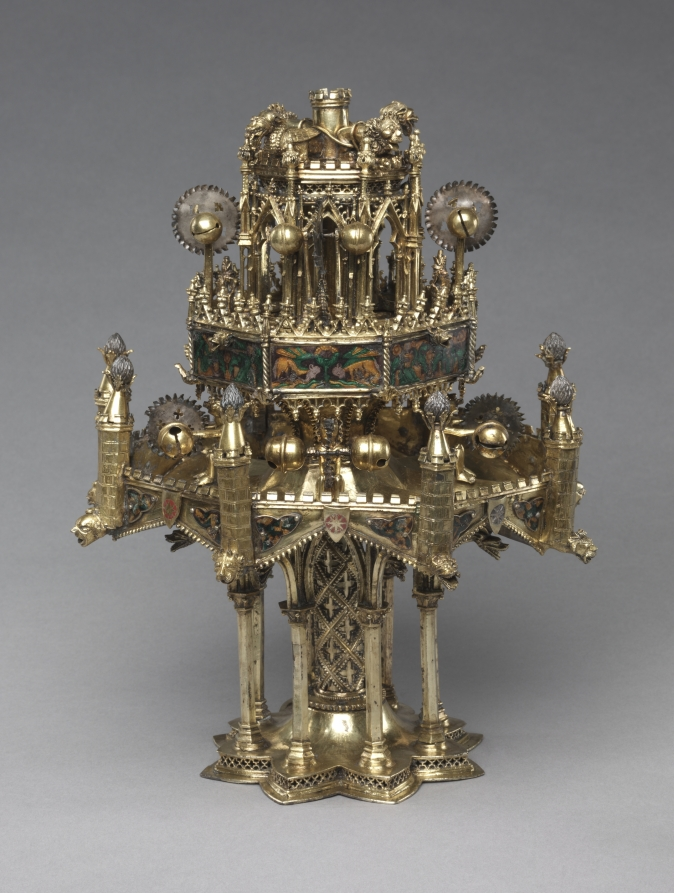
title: Table Fountain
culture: France, Paris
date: c. 1320–40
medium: gilt-silver and translucent enamels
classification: Metalwork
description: Conceptually and stylistically, this object is beyond all else a piece of Gothic architecture in miniature with vaults, pinnacles, columns, and traceried arches. Though the artist who created it is unknown, he was unquestionably inspired by the great Gothic buildings of his time. The table fountain is a three-tiered assembly combining cast elements with bent sheets of gilt-silver. To these have been attached a series of enamel plaques representing grotesque figures, some of which play musical instruments. Water wheels and bells were added to capture motion and sound. The rich detail, precious materials, and involved ornamentation of this deluxe object suggest it would have been expensive to produce and highly treasured by its original owner, someone of high status, and would have been deployed as an object of spectacle. This is the most complete example of its type known to survive from the Middle Ages. Medieval inventories reveal that small fountains like this, often taking various forms, and generally made from precious metals, once existed in large numbers, thus making the Cleveland table fountain an extremely rare object.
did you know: This fountain with its minute architectural details and finely made enamel plaques displayed the wealth and refinement of the owner as it entertained his guests. Imagine hearing the ringing of the tiny bells when this fountain was in use.